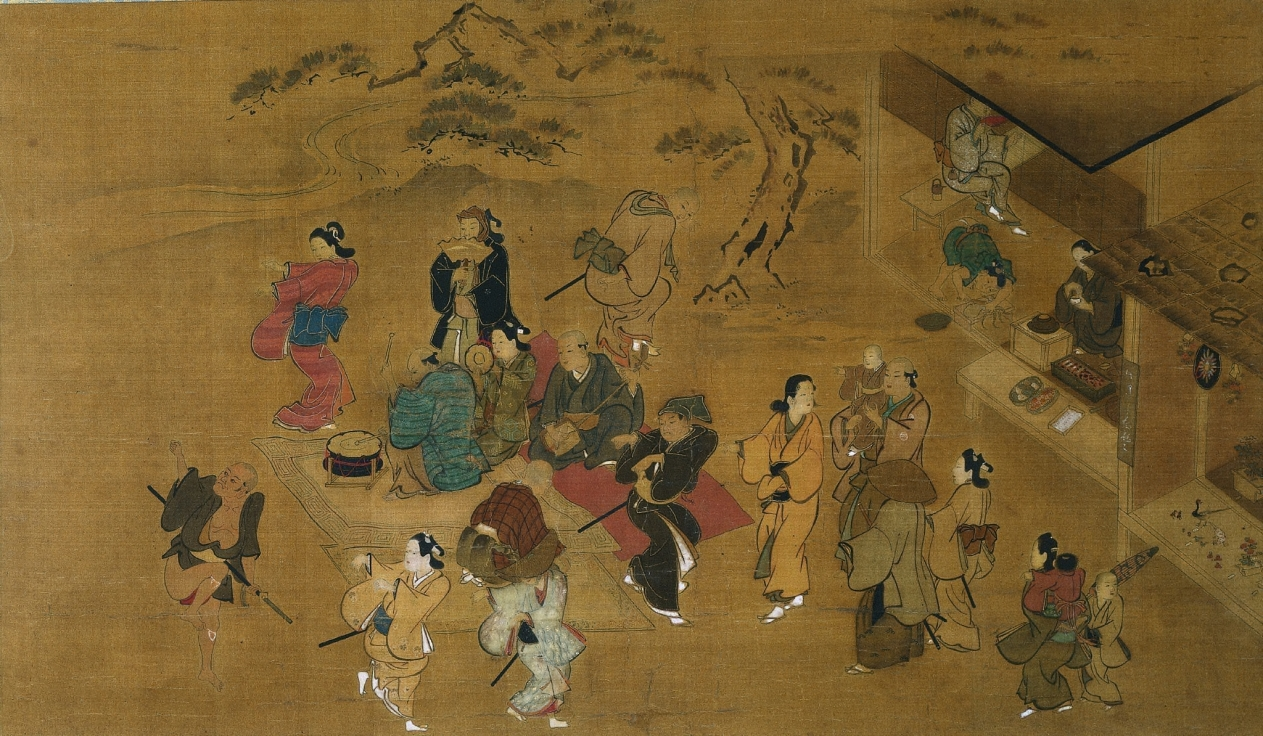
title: Spring Dance Scene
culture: Japan, Edo period (1615–1868)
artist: attributed to Hishikawa Moronobu (Japanese, c. 1618–1694)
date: mid- to late 1600s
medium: hanging scroll; ink and color on silk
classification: Painting